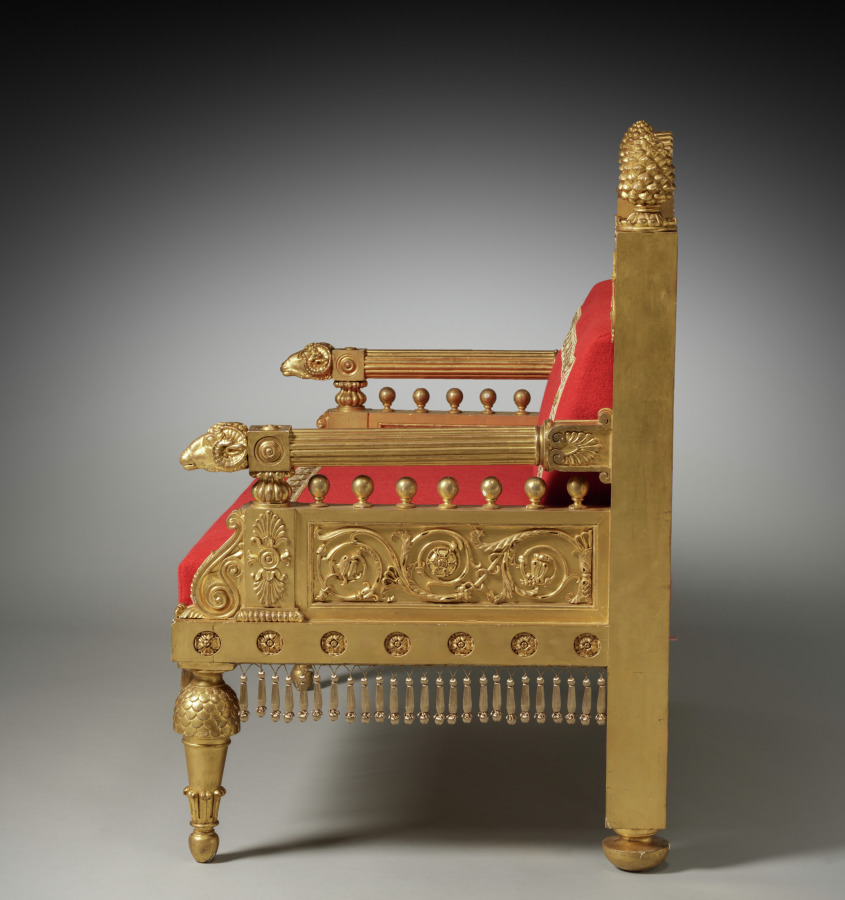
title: Settee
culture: England, 19th century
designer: Thomas Hope (British, 1769–1831)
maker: Unknown Maker (British)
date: c. 1802–07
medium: gilt-wood, reproduction wool upholstery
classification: Wood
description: An art collector, designer, and champion of neoclassicism, Thomas Hope designed this settee for display in his London house. Hope’s design exemplifies the continued interest in neoclassical ornament around 1800 through the use of elaborately carved friezes, a central pediment, and a lavishly gilded surface. In 1807 Hope published Household Furniture and Interior Decoration, featuring descriptions of his renowned collection of antiquities and the interior furnishings from his London house, including this settee. Many architects and cabinetmaking firms took inspiration from Hope’s designs, adapting Greek and Roman forms to create bold expressions of neoclassicism in their architecture and decoration.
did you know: The acorn finials, ram’s heads, and clusters of stylized honeysuckle flowers along the settee’s frame are typical of Thomas Hope’s neoclassical designs.